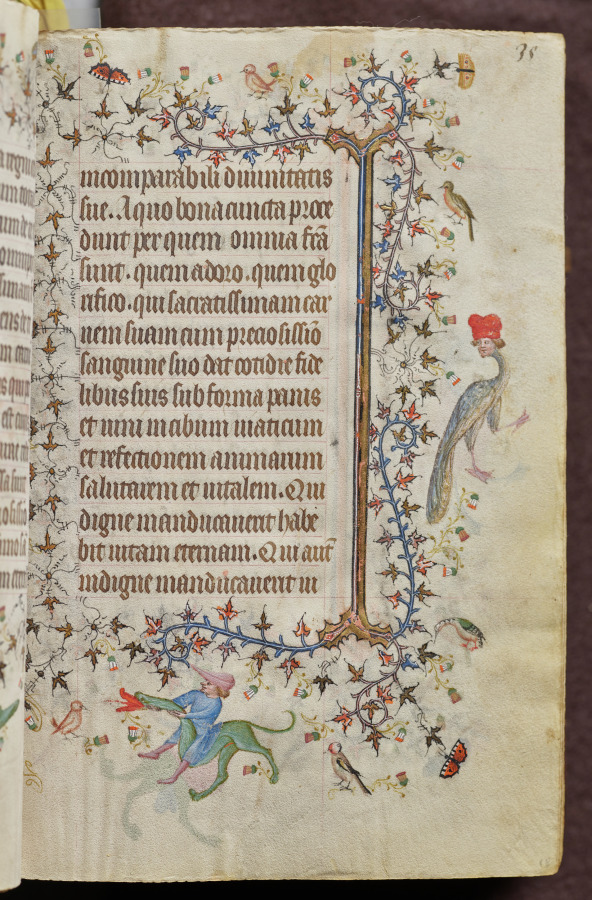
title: Hours of Charles the Noble, King of Navarre (1361-1425): fol. 18r, Text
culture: France, Paris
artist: Master of the Brussels Initials and Associates (French)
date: c. 1405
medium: ink, tempera, and gold on vellum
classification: Bound Volume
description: This precious volume was obviously highly prized by its owner, the French-born King of Navarre, who had his coat of arms painted on no less than twenty folios. Rather than directly commissioning this manuscript from a specific workshop, it seems that Charles the Noble acquired his book of hours -- perhaps ready-made for the luxury market -- while on a trip to Paris in 1404-05. A collaborative effort, six painting styles are evidenced within the pages of this codex, those of two Italians, two Frenchmen, and two Netherlanders. The painter who was responsible for the planning and decoration of the book, and who produced seventeen of the large miniatures, was a Bolognese artist known as the Master of the Brussels Initials. His principal assistant, responsible for most of the borders, was a Florentine who signed his name "Zecho" da Firenze on folio 208 verso.